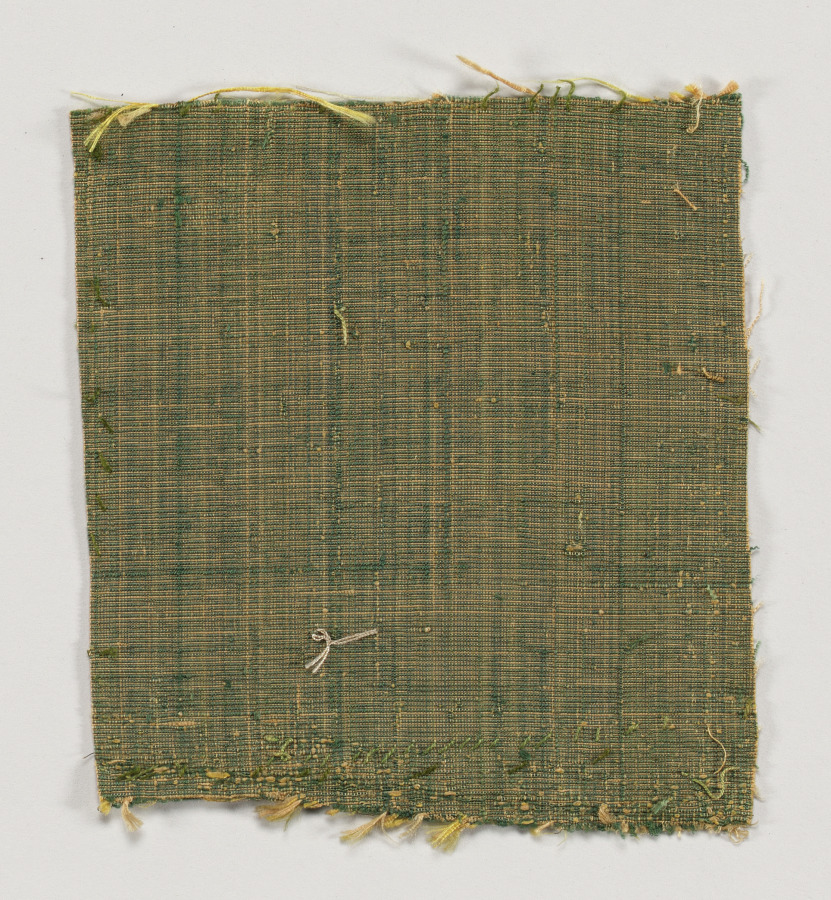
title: Velvet Fragments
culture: Spain, early 16th century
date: early 16th century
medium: velvet (cut, voided, and brocaded): silk and gold thread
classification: Velvet